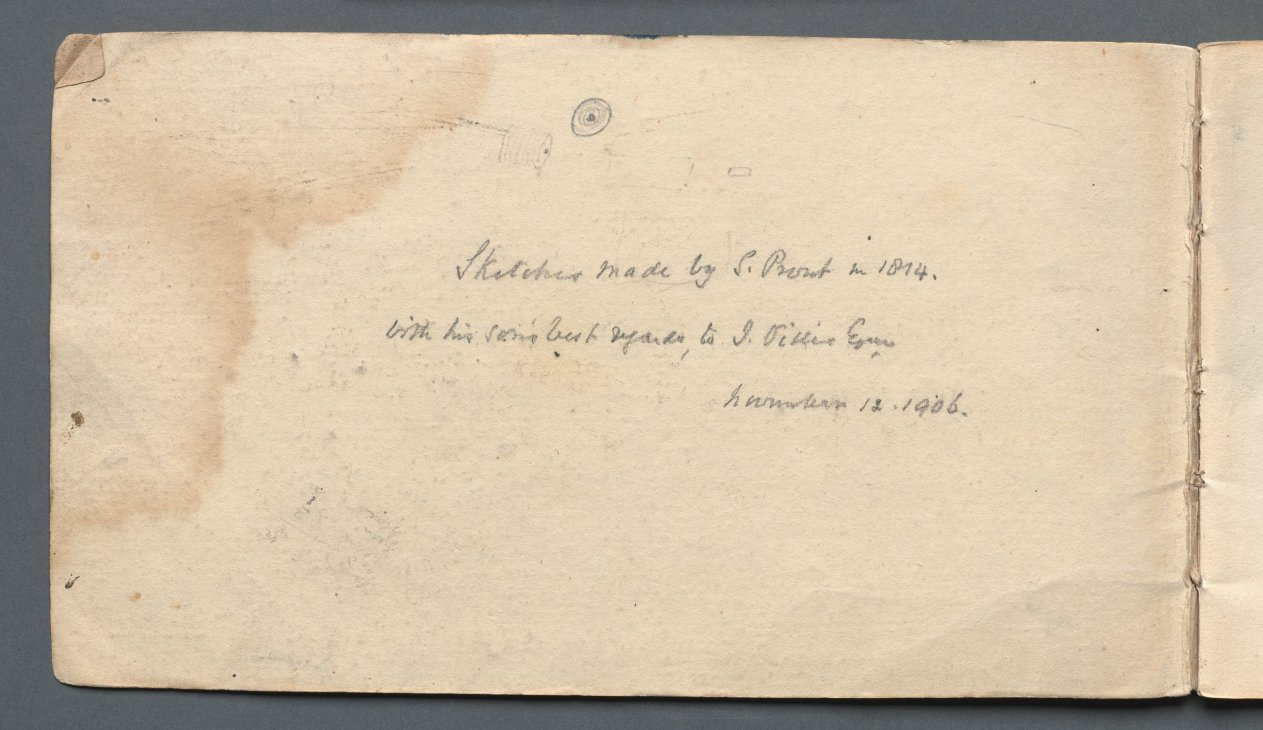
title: Sketchbook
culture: England, 19th century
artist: Samuel Prout (British, 1783–1852)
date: 1814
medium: graphite with gray and brown wash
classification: Bound Volume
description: John Ruskin (also in this gallery) admired Prout’s strength as a draftsman. Like the topographical watercolorists of the 18th century, Prout emphasized form over color in his watercolors, as is evident in the monochromatic, delicate English views in this sketchbook.